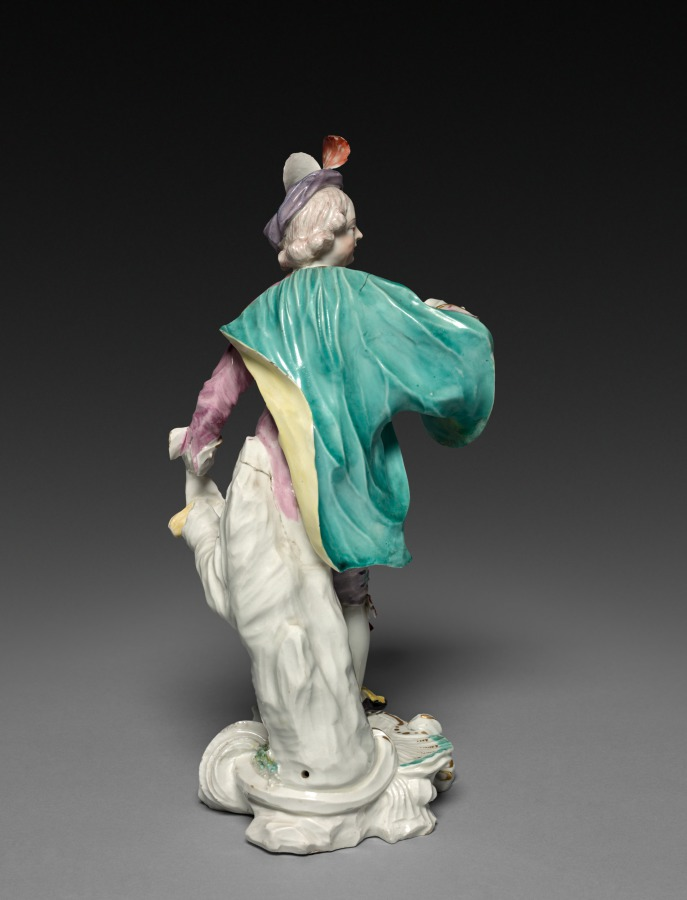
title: Dancer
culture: England, Derby, 18th century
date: c. 1760–1765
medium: soft-paste porcelain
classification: Ceramic